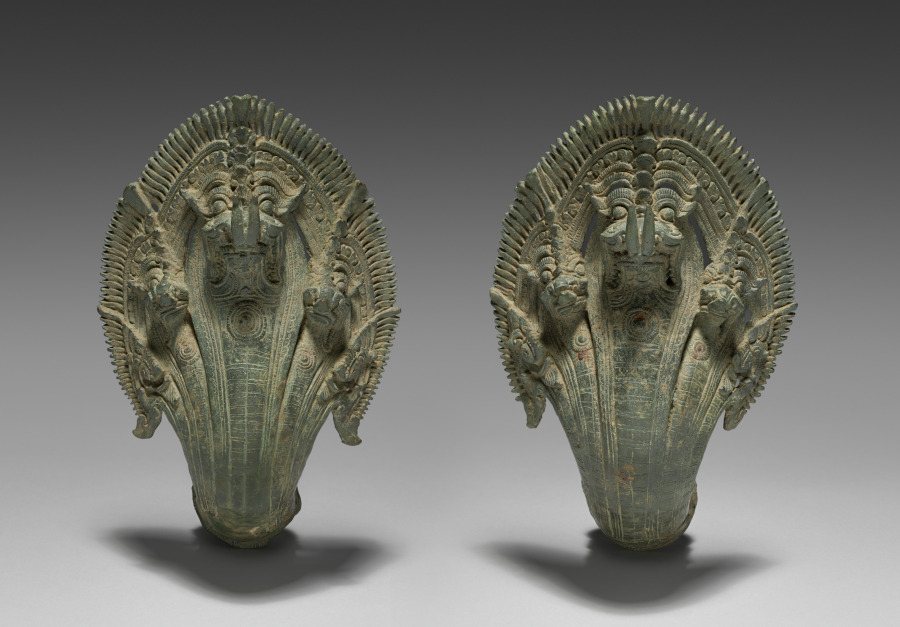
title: Pair of naga finials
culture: Cambodia, probably Angkor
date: 1100s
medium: bronze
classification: Metalwork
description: When members of the royal family or priesthood traveled in a public festival procession or to a temple to make offerings or participate in a ceremony, they would be carried in a palanquin, or a covered litter. Portable objects of veneration, such as bronze images or a sacred fire, were also carried on palanquins. The palanquins had wooden poles, hanging seats or raised platforms, and bronze fittings cast in intricate forms and gilt, lending the palanquins a sumptuous quality. The royal palanquins were typically fitted with multiheaded, serpent-shaped finials at the ends of the poles and corners of the elevated platforms. Naga means serpent in Sanskrit, a language from India selectively appropriated by the Khmer in Cambodia. In their own indigenous mythology, the Khmer people trace their descent from a naga princess and a prince from the island of Java who journeyed to Cambodia. The naga remains a potent emblem for the Khmer nation to this day; it is ubiquitous on Cambodian monuments.